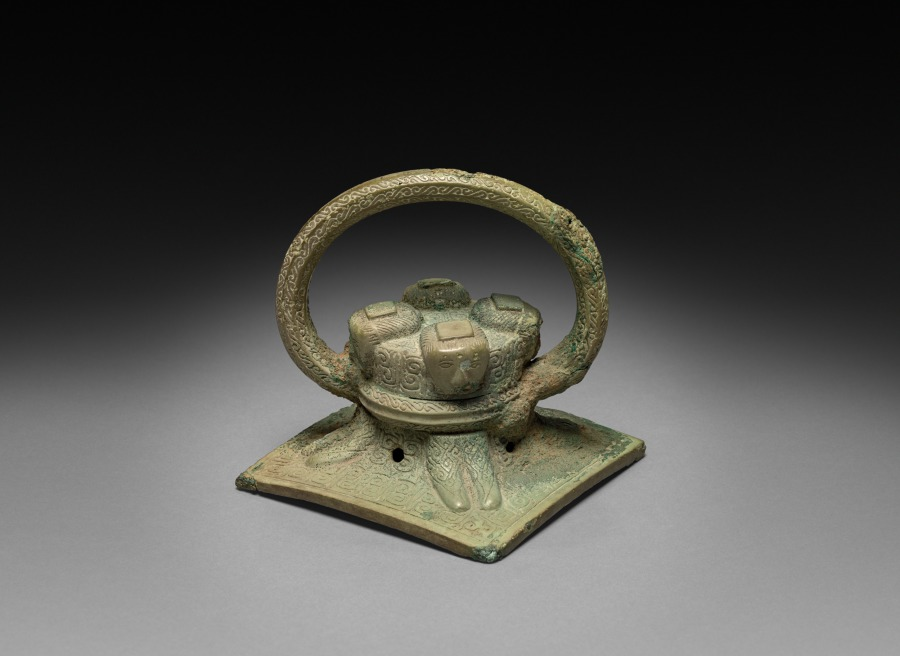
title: Handle of a Jiangu Drum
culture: China, Zhou dynasty (c. 1046–256 BCE), Spring and Autumn period (770–475 BCE)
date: c. 770–475 BCE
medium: bronze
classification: Metalwork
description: The most remarkable feature of this object is the four kneeling figures with ornamented bodies; Han dynasty sources mention cut hair and tattooing as a custom among the local Yue people. This bronze work served as a handle and top ornament of a large, barreled drum called jiangu (建鼓), supposedly made of lacquer and alligator skin. Two comparable handles from tombs dated to the Spring and Autumn period in Jiangsu and Anhui provinces were found amid musical instruments. The handle allows the drum to be suspended and played from the sides.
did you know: The square stud on the head of each figure may represent a bun.